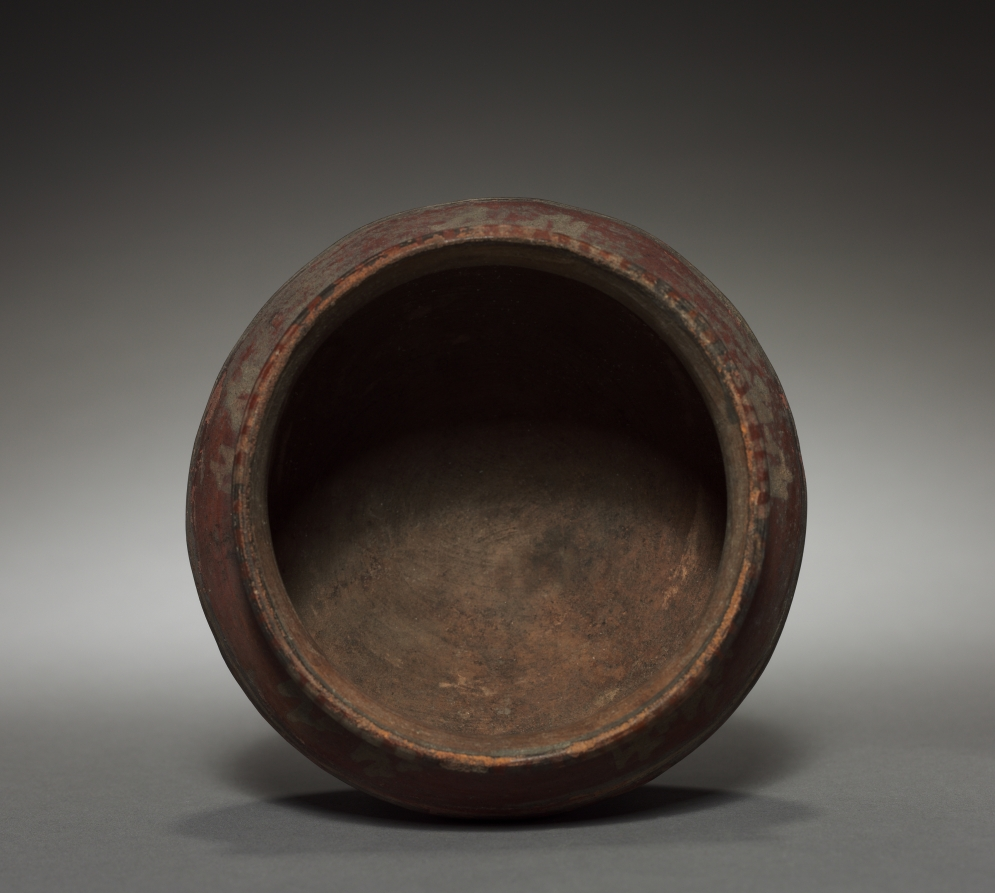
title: Bowl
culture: Peru, South Coast, 10th-11th century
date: 900–1100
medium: pottery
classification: Ceramic